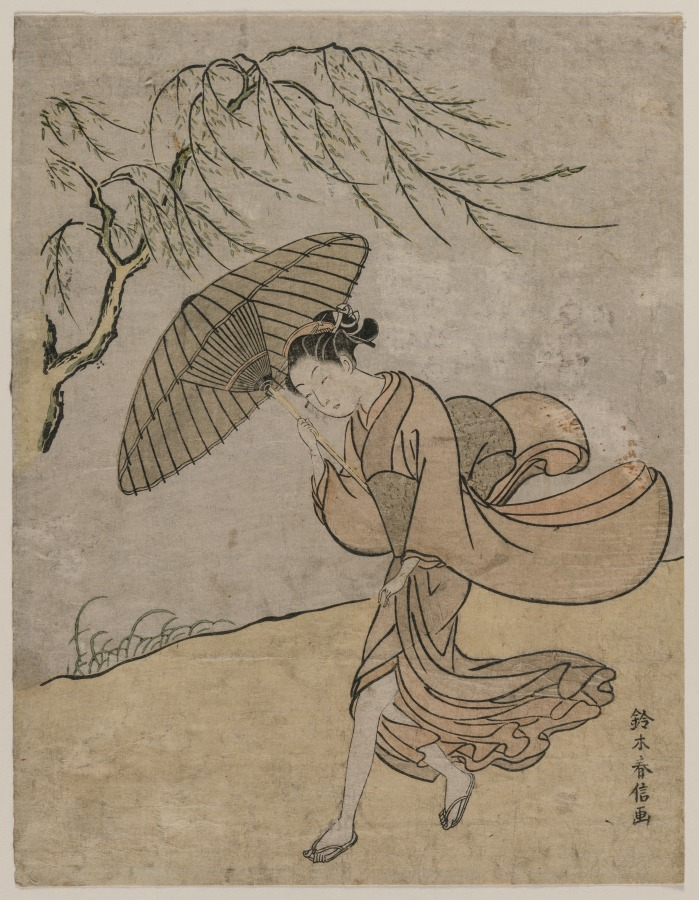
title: Woman Running Past a Willow Tree in a Breeze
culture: Japan, Edo period (1615–1868)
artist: Suzuki Harunobu (Japanese, 1724–1770)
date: 1766 or 1767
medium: color woodblock print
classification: Print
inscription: Signature: Suzuki Harunobu ga